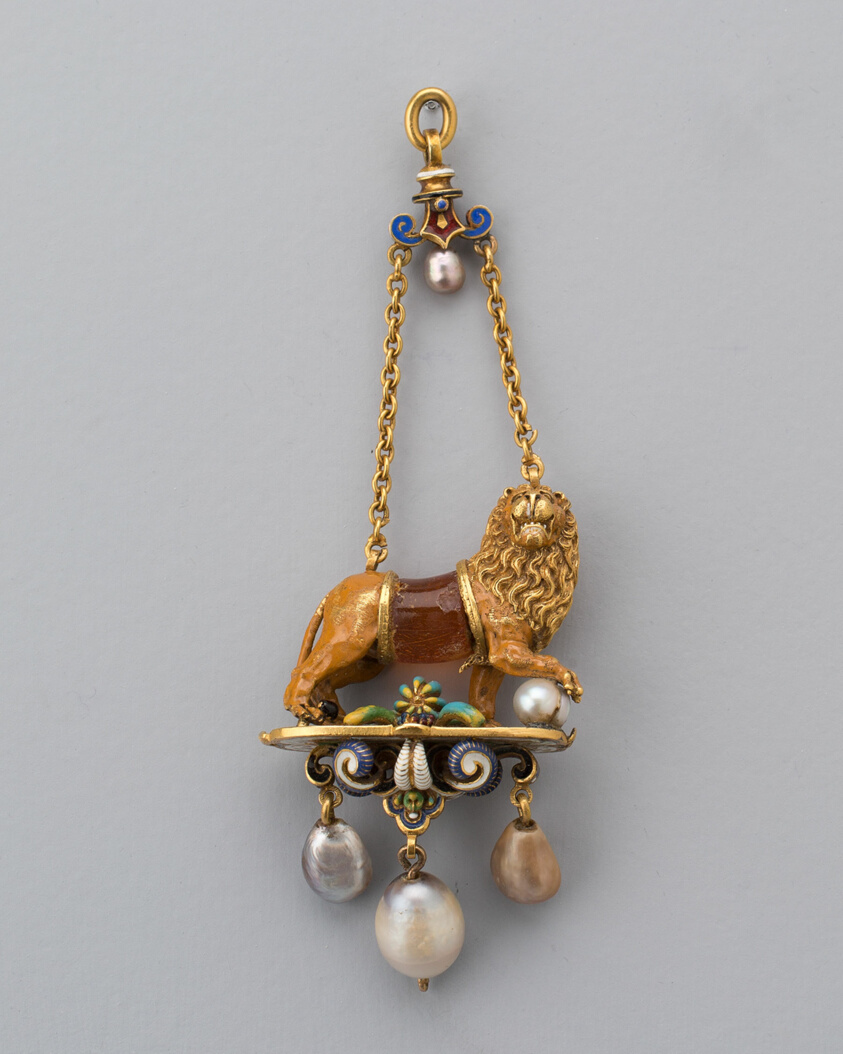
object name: Costume and Accessories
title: Pendant with a Lion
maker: European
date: 17th/19th century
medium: Gold, amber, enamel, and pearls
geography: Europe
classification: pendant (jewelry); jewelry; european decorative arts; costume